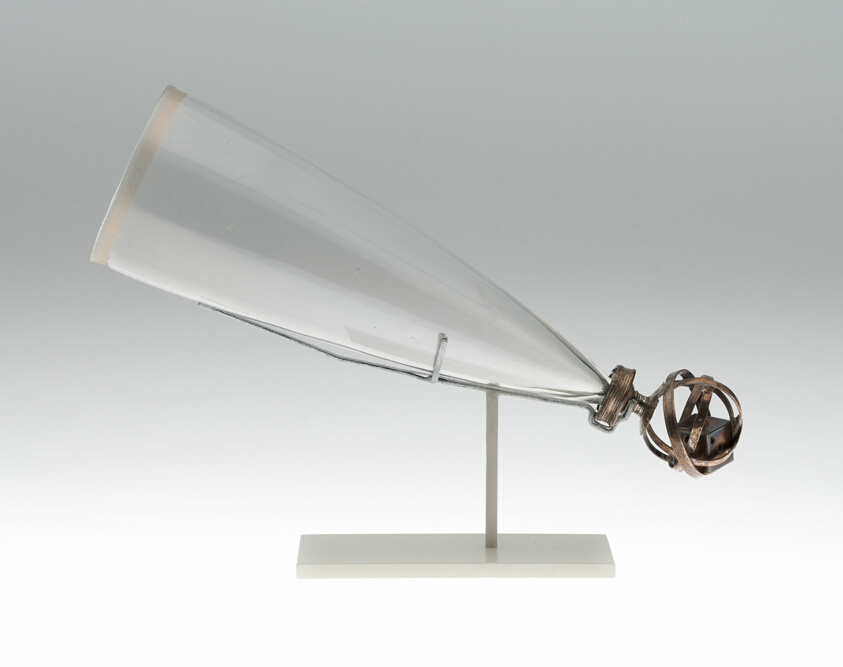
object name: Glass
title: Stirrup Glass (Sturzglas) with Silver Armilary Sphere Incorporating Dice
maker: Netherlands, Antwerp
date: 1590/1600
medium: Glass and silver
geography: Antwerp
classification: drinking vessel; glass; european decorative arts